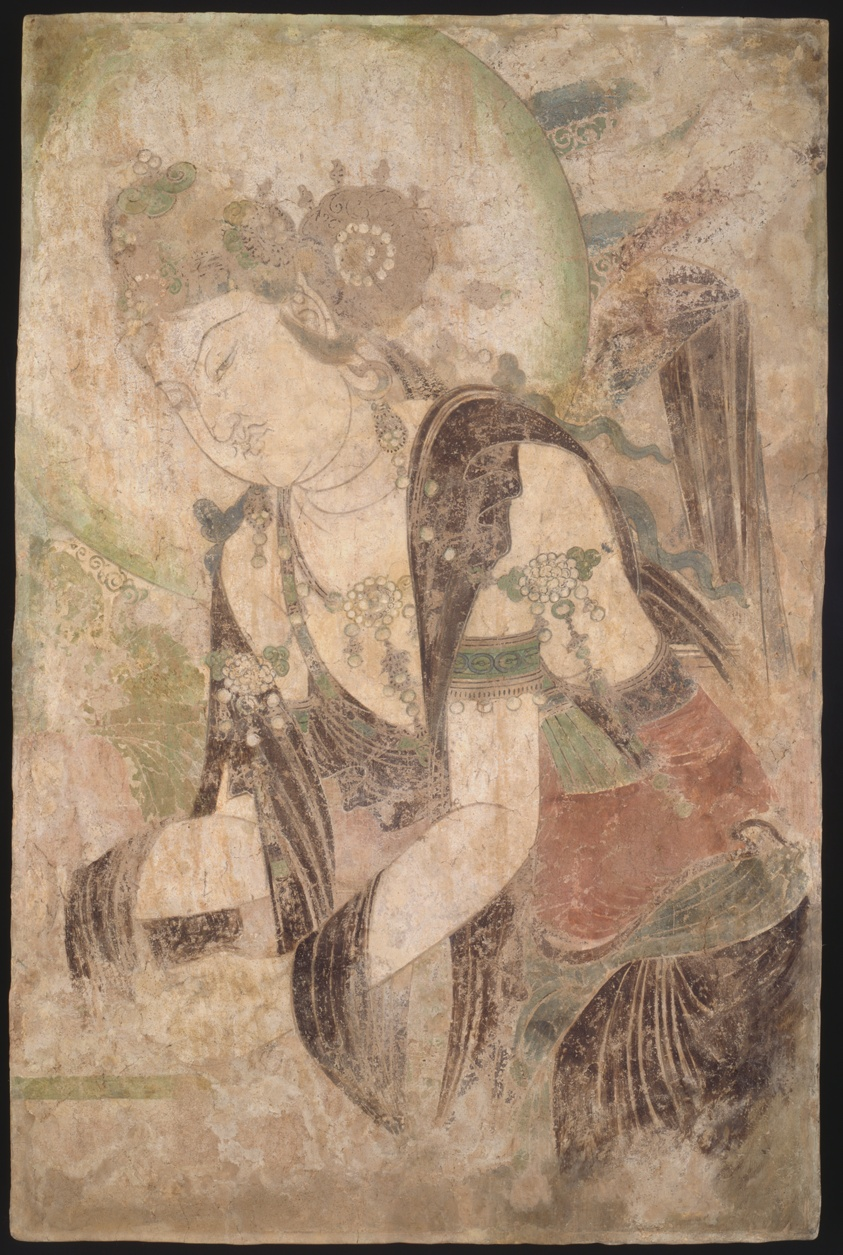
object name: Architectural fragment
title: Bodhisattva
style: Chinese (culture or style)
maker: China, probably from the Cisheng Si (Cisheng temple), Henan province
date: Song dynasty (960-1278)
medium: Ink and colors on primed mud-wall construction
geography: China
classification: painting; asian art; architectural fragment